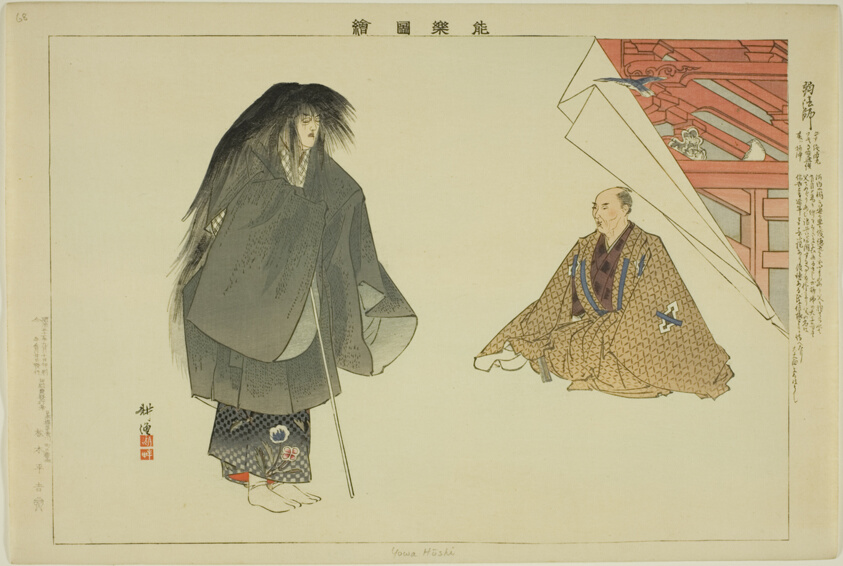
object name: Print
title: Yowa Hoshi, from the series "Pictures of No Performances (Nogaku Zue)"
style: Japanese (culture or style)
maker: Tsukioka Kogyo; Japanese, 1869-1927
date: 1898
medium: Color woodblock print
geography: Japan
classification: woodblock print; print; asian art